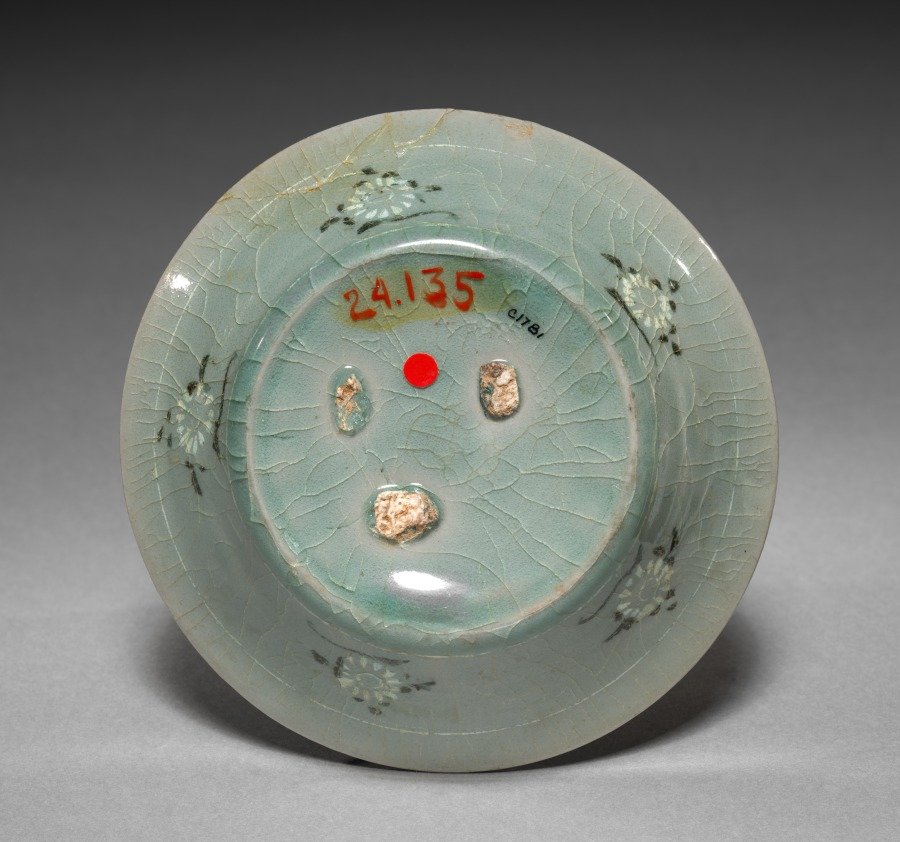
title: Dish with Inlaid Chrysanthemum Design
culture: Korea, Goryeo dynasty (918–1392)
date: 1200s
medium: ceramic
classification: Ceramic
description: Celadon wares used for everyday such as this dish were among the most common burial objects in tombs during the Goryeo period (918–1392). Furnishing tombs with an elaborate assemblage of objects was believed to honor and comfort the newly dead. Generally, Goryeo tombs were left untouched until the late 1800s. During the colonial period (1910–45), however, Japanese archaeologists competitively excavated the tombs located in Kaeseong, the former capital of the Goryeo period, and these wares soon became available for Japanese and Western collectors.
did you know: On the base of this tea bowl, three small spur marks made of bits of clay remain visible, indicating an individual protective casing of fire clay (saggar).